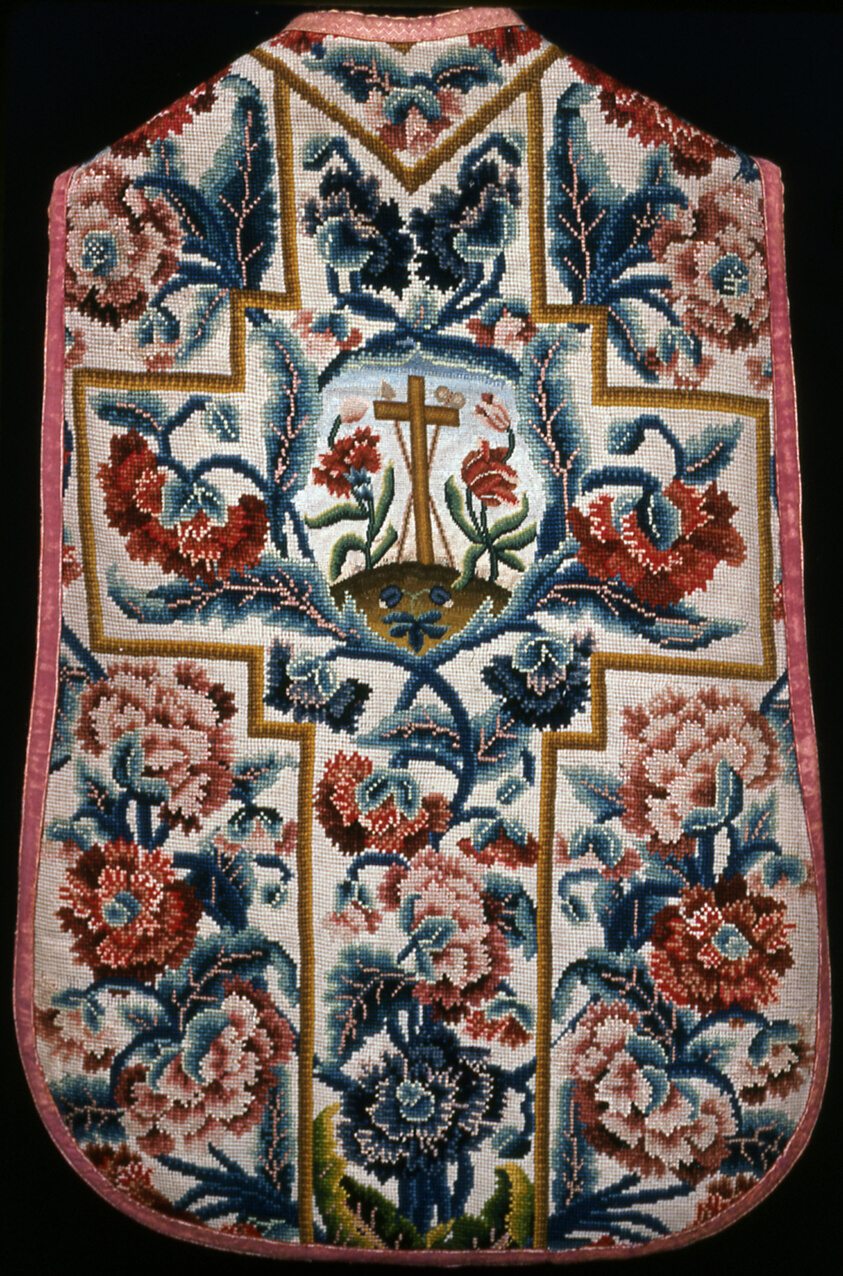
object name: Textile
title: Chasuble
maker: Probably England or France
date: 1800/50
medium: Linen, plain weave; embroidered with wool yarns and silk floss in cross and tent stitches; edged with cotton and silk, plain weave with supplementary patterning wefts; lined with cotton, weft-float faced 4:1 satin weave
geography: England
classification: textile; liturgical; needlework (visual works); chasuble; costume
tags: flowers, white (color), red (color), pink (color), green (color), foliage, crosses, carnations